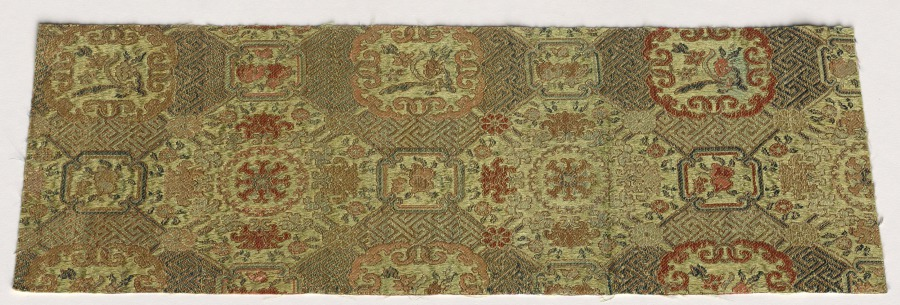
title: Textile Fragment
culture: Japan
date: 1800s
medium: silk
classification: Textile